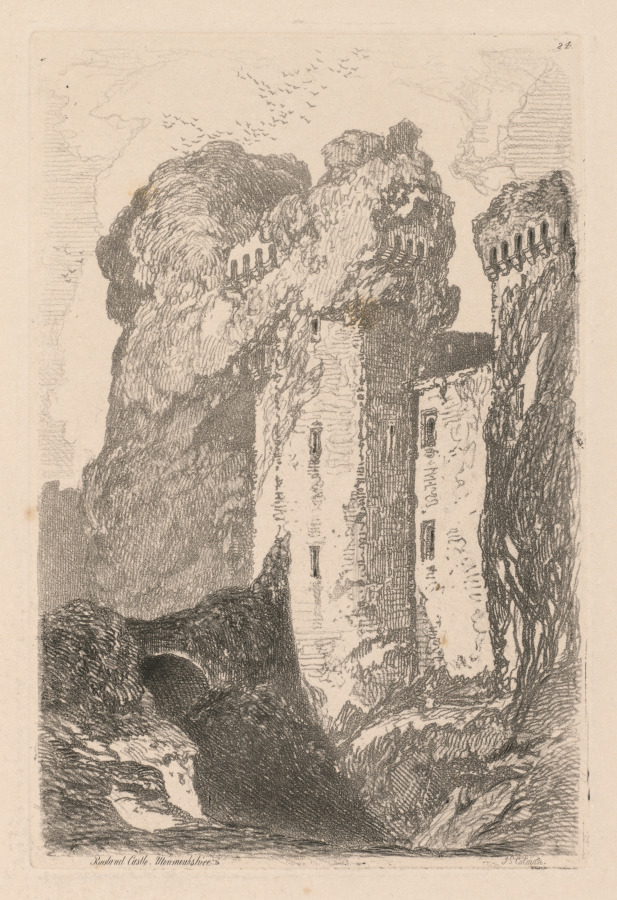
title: Liber Studiorum: Plate 24, Ragland Castle, Monmouthshire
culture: England, 19th century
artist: John Sell Cotman (British, 1782–1842)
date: 1838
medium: softground etching, from a bound volume containing 48 plates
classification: Bound Volume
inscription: In plate, within image, upper right: 24; in plate, lower left, below image: Ragland Castle, Monmouthshire; in plate, lower right, below image: J S Cotman